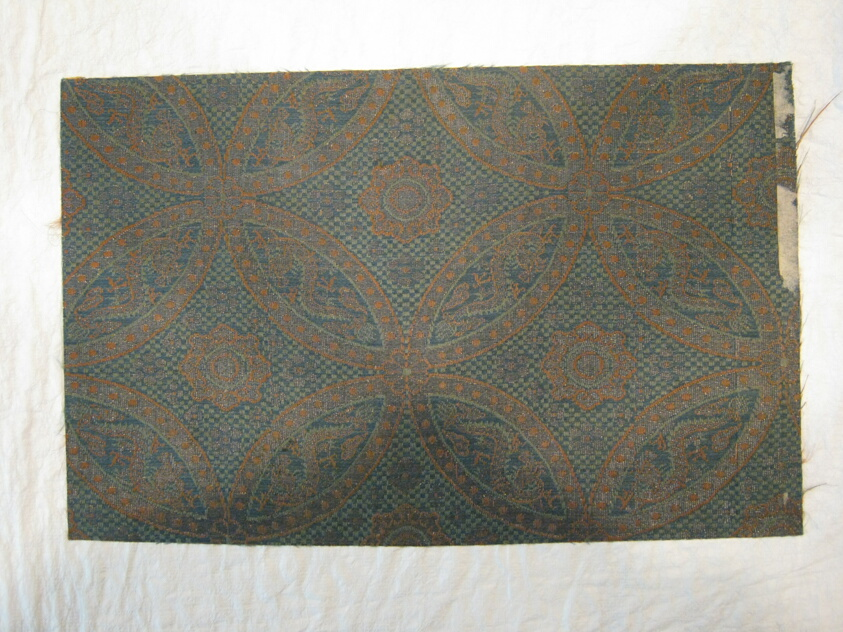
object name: Textile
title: Fragment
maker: China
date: Edo period (1615–1868), 1700/25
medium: Fancy compound satin silk and silvered paper; 2 strips to m.m.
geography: Japan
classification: textile; weaving